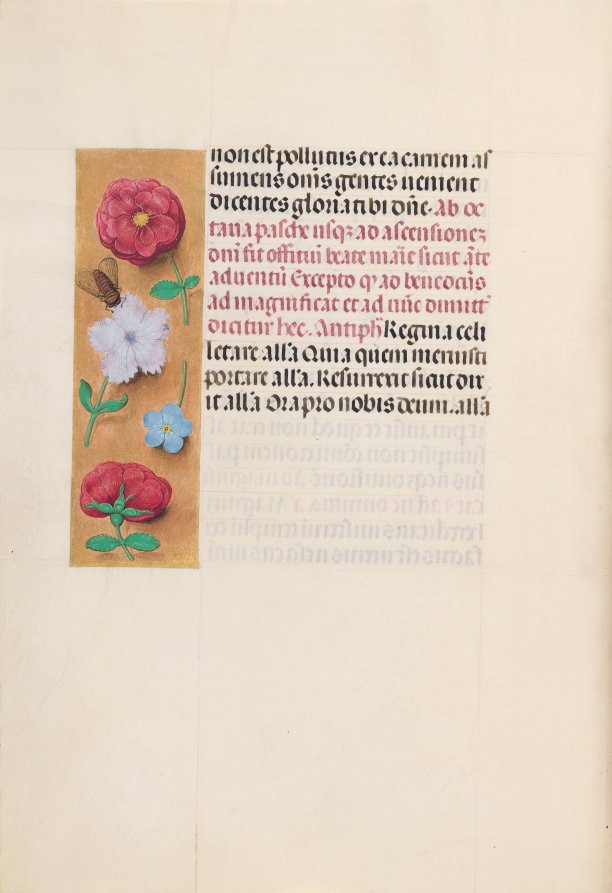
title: Hours of Queen Isabella the Catholic, Queen of Spain: Fol. 166v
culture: Flanders, Ghent and Bruges, late 15th century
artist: Master of the First Prayerbook of Maximillian (Flemish, c. 1444–1519)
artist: and Associates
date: c. 1500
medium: ink, tempera, and gold on vellum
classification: Bound Volume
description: This manuscript was illuminated by a circle of at least five highly organized manuscript painters active in the Flemish cities of Ghent and Bruges. The principal illuminator was Alexander Bening, who painted the majority of the book's miniatures. Manuscripts produced by this circle of artists are renowned for the decoration of their borders, which typically feature a rich variety of realistically-painted flowers, birds, and butterflies. This prayer book, called a book of hours, was intended not for a cleric, but for the private devotions of a lay person-in this case, Isabella the Catholic, Queen of Spain (1451-1504). Isabella's coat of arms embellishes the book's frontispiece. It is unlikely that the book was commissioned by the Queen herself; rather, she probably received it as a diplomatic gift from someone courting her patronage, perhaps Cardinal Francisco Jimenez de Cisneros. A Franciscan friar, Jimenez was dependent upon Isabella for his advancement, first to the post of Queen's confessor in 1492, and then to Archbishop of Toledo in 1495.